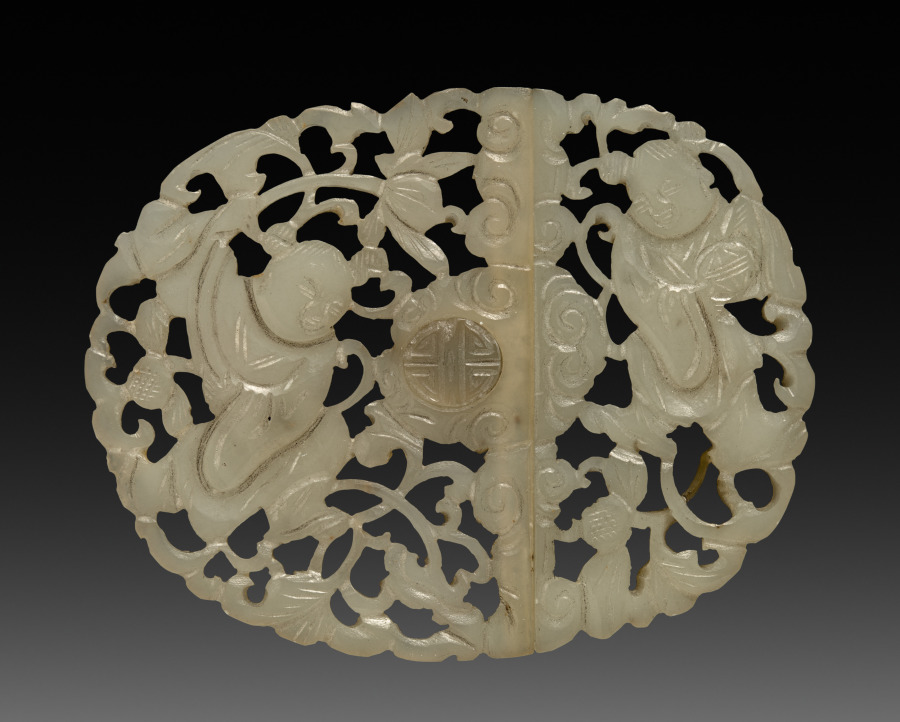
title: Buckle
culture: China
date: 1800s–1900s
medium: white jade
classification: Jewelry